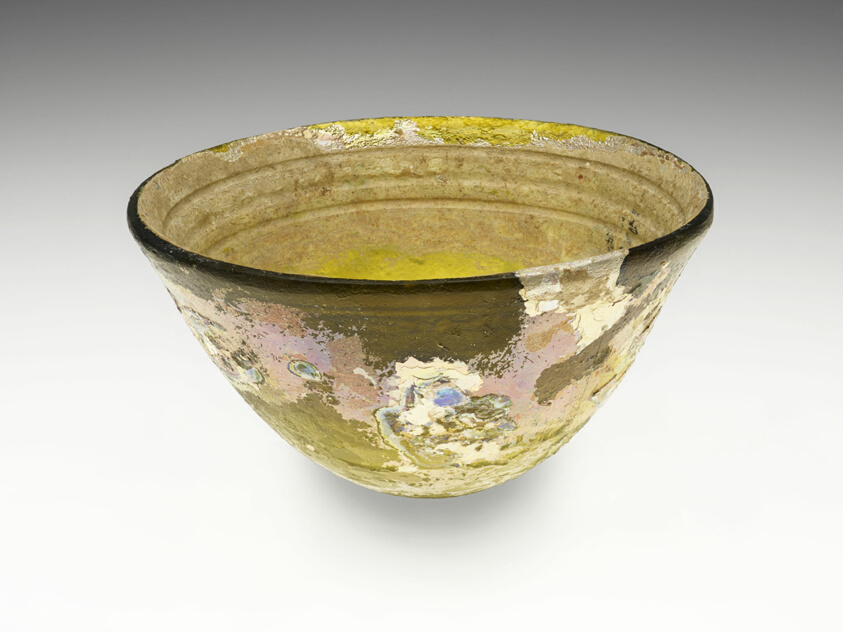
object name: Vessel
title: Bowl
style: syrian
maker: Late Hellenistic or early Roman; eastern Mediterranean, probably coast of Syria or Palestine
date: mid–2nd-early 1st century BCE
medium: Glass, cast (sagged?)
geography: Syria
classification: bowl; glass; vessel; ancient art